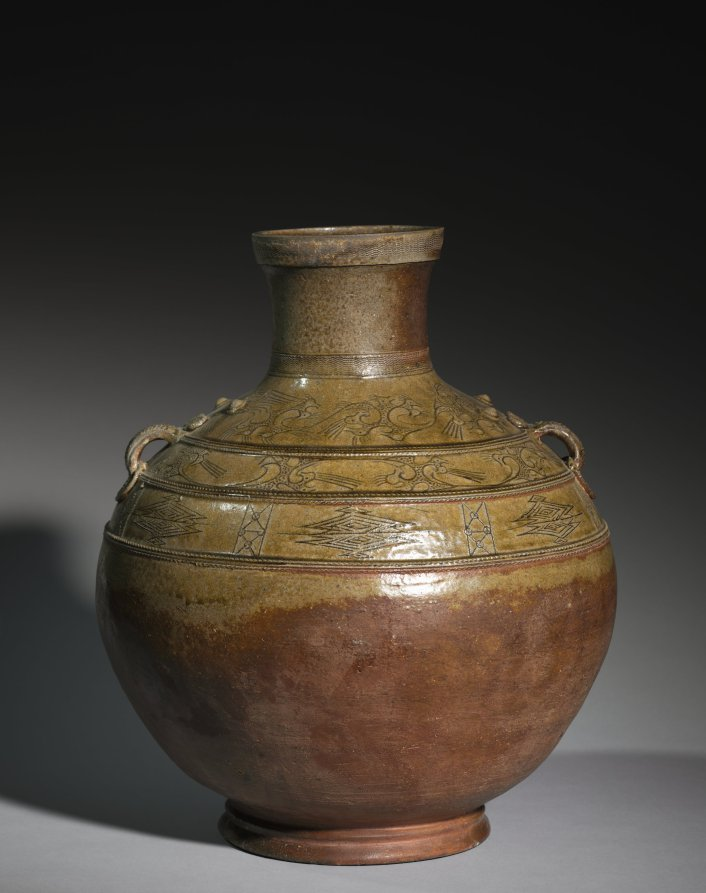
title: Jar (Hu)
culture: China, probably Zhejiang province, Han dynasty (202 BCE–220 CE)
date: 100 BCE–100 CE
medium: glazed stoneware with incised and applied decoration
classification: Ceramic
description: This superb Han dynasty jar has a robust shape imitating that of the bronze (hu) and is covered with a thin brownish-green glaze. The introduction of glazing—which provided an impervious coating to a clay body—marked a technological breakthrough in Chinese ceramic history. High-fired glazed pots were made as early as the Shang and Zhou dynasties (about 1600–256 BC). Potters gained practical technical knowledge of the reaction between the metallic oxide in the glaze and the kiln atmosphere to modify the color of a glaze.